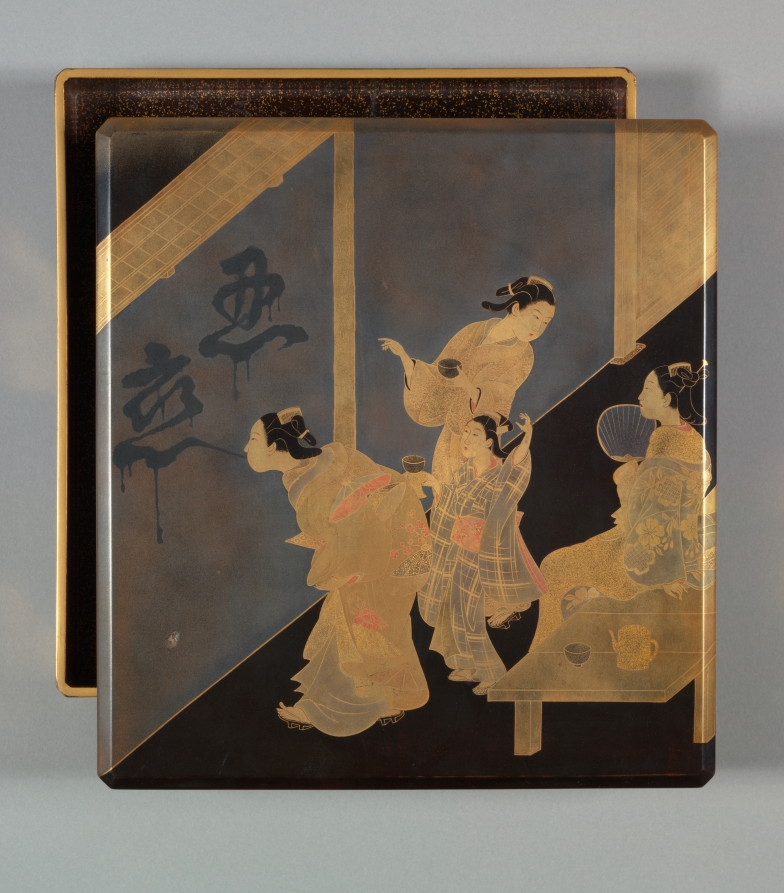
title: Writing Box with Spitting Courtesan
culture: Japan, Edo period (1615–1868)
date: early to mid-1800s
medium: Lacquered wood with maki-e (image made of sprinkled gold dust)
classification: Lacquer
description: The design on this writing box shows a courtesan who has just completed an impressive feat of spitting the term shinobukoi (忍恋), which could be translated as “hidden love” or “unrequited love,” on an earthen wall. The phrase appeared in classical Japanese poetry anthologies produced by nobles writing in ink on the finest decorated papers. Here, the confining walls of the brothel district become a space for public announcement in graffiti, with the medium being perhaps tea.